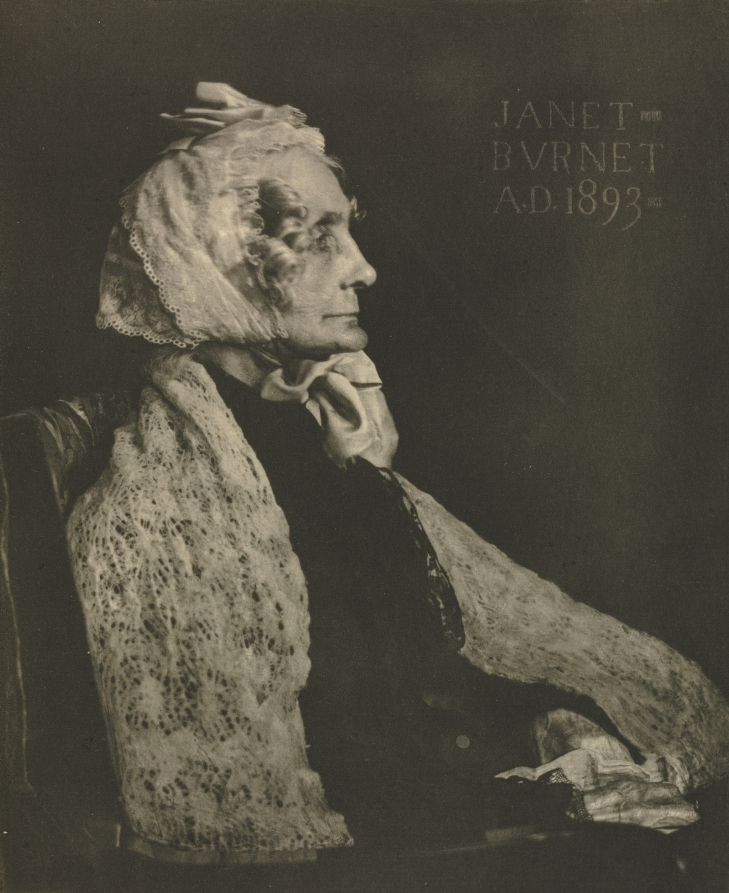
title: Camera Work: Janet Burnet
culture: England, 20th century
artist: J. Craig Annan (British, 1864–1946)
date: 1907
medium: photogravure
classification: Bound Volume